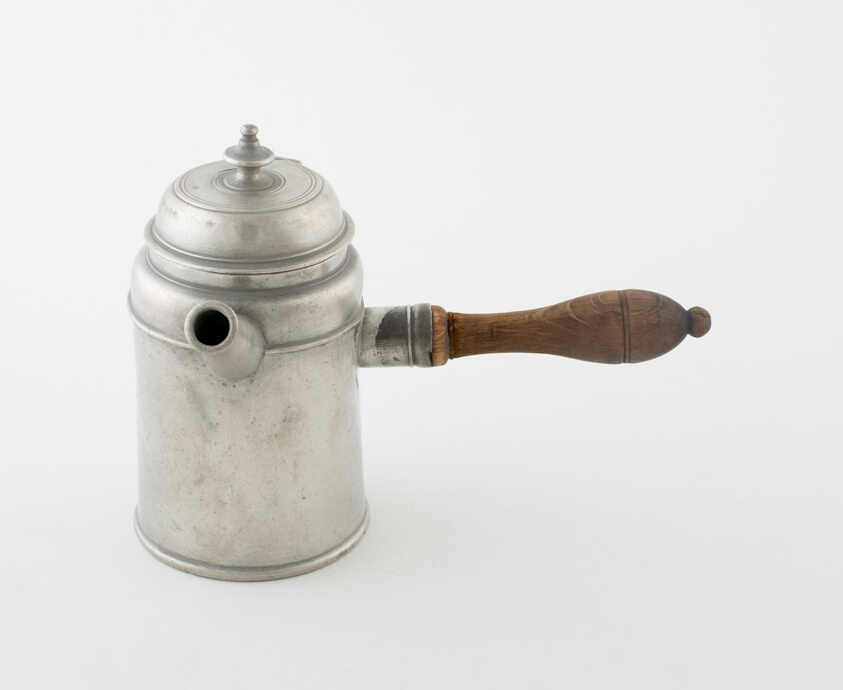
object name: Metalwork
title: Individual Coffee Pot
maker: Johann Traugott Böhme; German, active 1793-1814; Germany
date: c. 1800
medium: Pewter and wood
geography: Dresden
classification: pewter; metalwork; european decorative arts